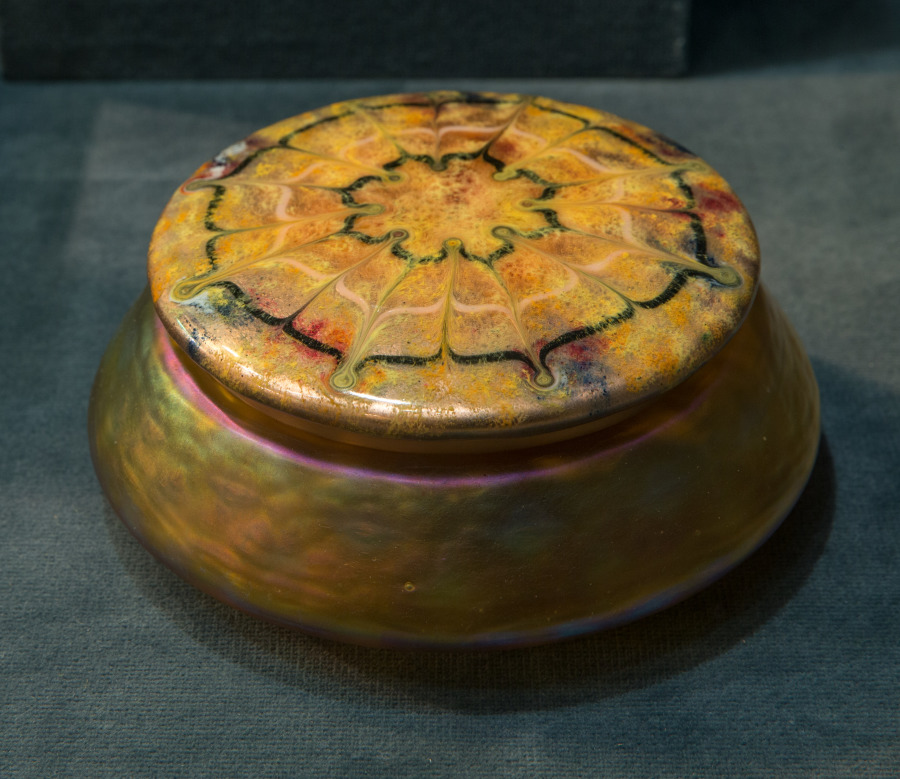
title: Covered Box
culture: America, New York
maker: Tiffany Glass & Decorating Company (America, New York, 1892–1902)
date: c. 1898–1902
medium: Favrile glass, enamel on copper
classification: Glass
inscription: Louis C. Tiffany Favrile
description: By 1900 Tiffany had expanded his empire by increasing the firm’s production of “fancy goods,” including inkstands, candlesticks, clocks, small boxes, desk sets, tea screens, and other functional objects. Along with the array of artistic glass designs from his factory in Corona, Queens, works in ceramic, bronze, other metals, and even jewelry abounded. These smaller, more affordable luxury items were designed with as much thought to artistry as the great stained glass windows and lamps through which the firm enjoyed unrivaled success.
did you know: This fanciful dressing table accessory likely contained dusting powder and a feather puff.